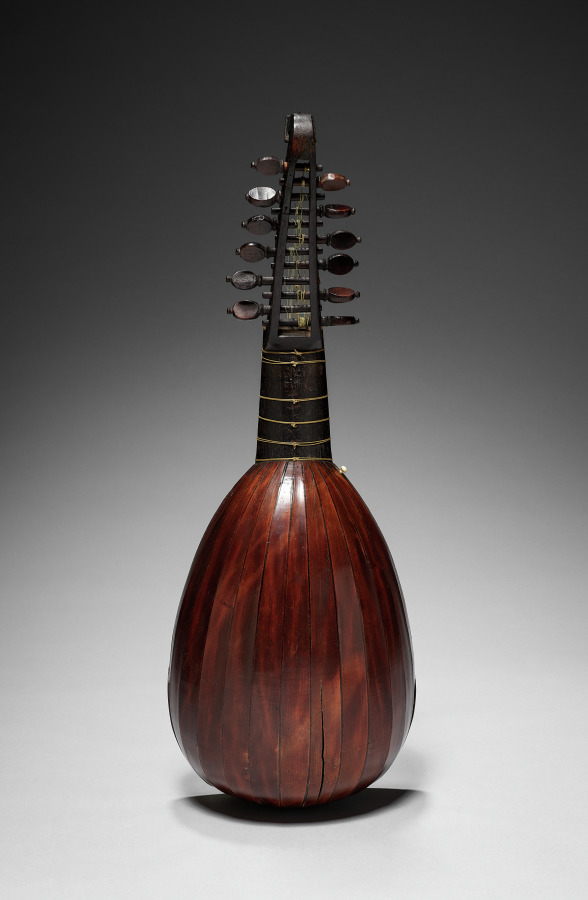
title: Lutina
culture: Italy, Milan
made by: Francesco Presbier (Italian)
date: 1736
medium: wood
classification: Musical Instrument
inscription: bears label: "Francesco Presbier in Milano nella/ contrada della Dogana fegno/ del Sole 1736."